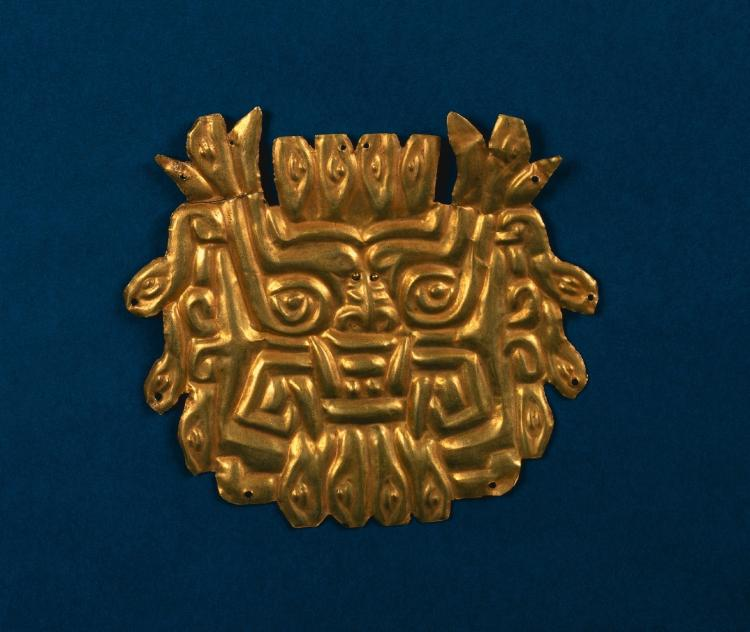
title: Plaque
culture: Peru, North Coast, Chongoyape(?), Chavín style (900-200 BCE)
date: c. 500–200 BCE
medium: hammered and cut gold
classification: Jewelry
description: These plaques showing a powerful Chavín deity may come from a group of gold objects found in a lavish tomb in the 1920s. One is shaped as the deity’s fanged head, its fur transformed into sixteen serpents that edge the plaque. On the other, the deity’s visually elusive body also appears: the clawed hands over the chest may clutch a horizontal staff, an emblem of authority; across the waist is a belt that sprouts serpents; and beneath are the legs and feet, which stand atop fanged masks.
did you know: Hammered gold ornaments have been produced in the Andes since 1500 BCE.